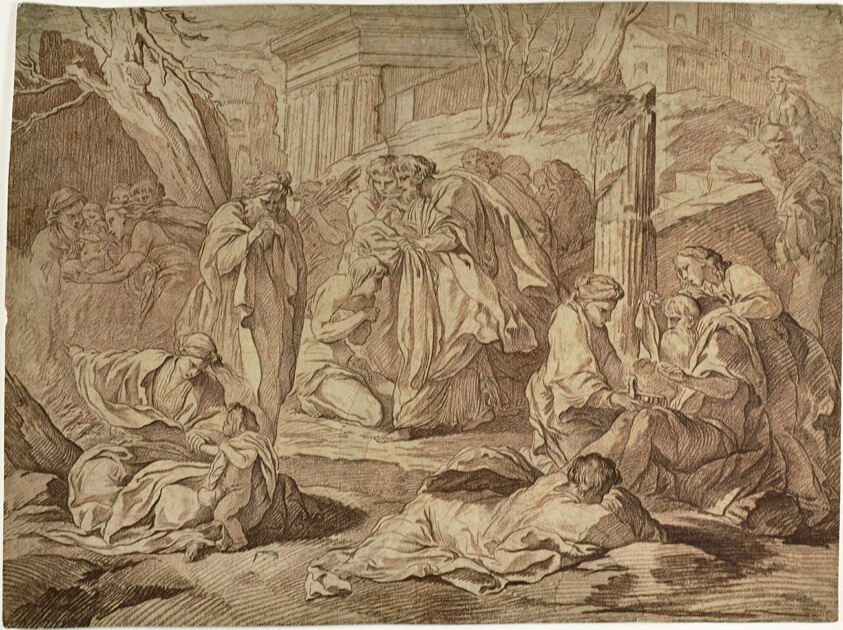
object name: Drawing and Watercolor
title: A Saint Clothing the Poor Among the Ruins of an Earthquake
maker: Attributed to Edme Bouchardon; French, 1698-1762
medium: Red chalk on buff laid paper, laid down on ivory laid paper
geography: France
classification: chalk; drawings (visual works); prints and drawing